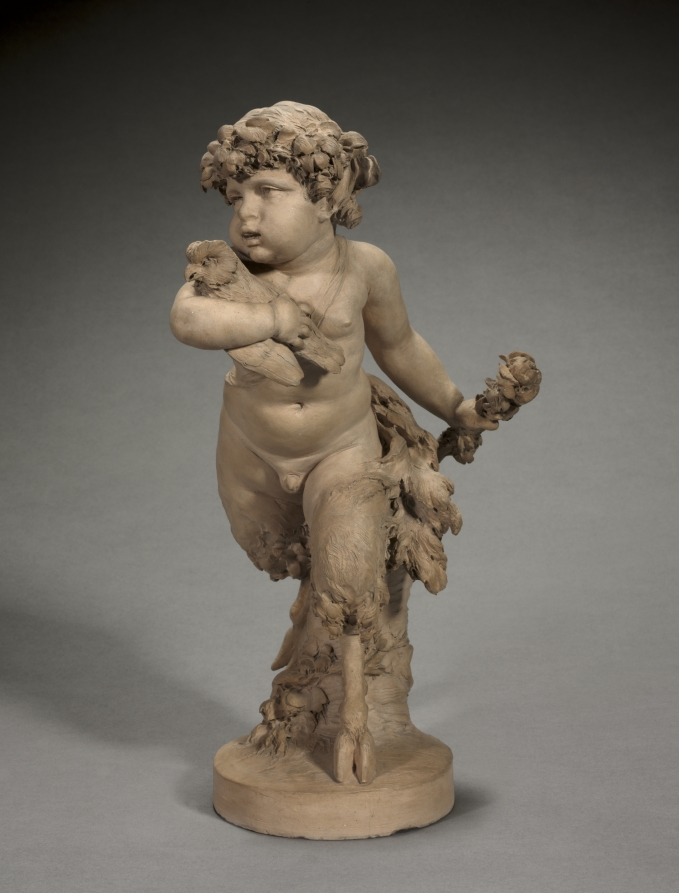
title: Young Satyr Running with an Owl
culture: France, 18th century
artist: Clodion (French, 1738–1814)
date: 1770s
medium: terracotta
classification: Sculpture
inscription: signature incised on back: CLODION.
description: These works by French sculptor Claude Michel, known as Clodion (1738–1814), shows a pair of young satyrs. Clodion was fond of depicting characters from classical antiquity in his work, and the subject of child or baby satyrs in Bacchanalian celebrations appear often in the work of Rococo artists. The female satyr wraps a plump arm around a nest filled with baby birds, while her male counterpart holds an owl. Balancing on one foot, the two flee the scene of their theft.